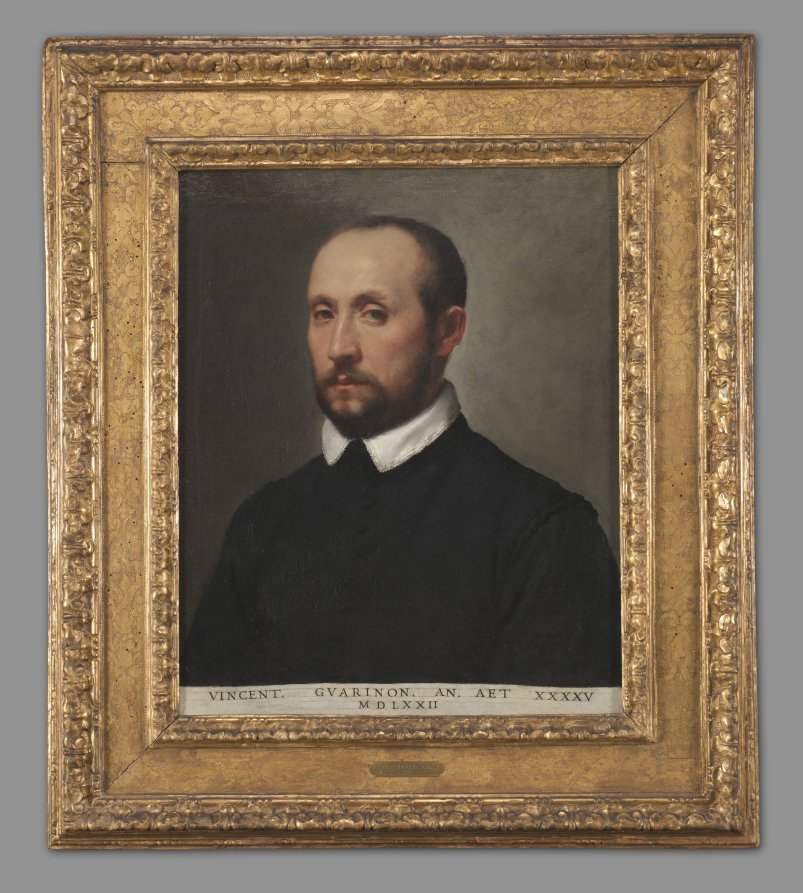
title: Portrait of Vincenzo Guarignoni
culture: Italy, Bergamo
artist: Giovanni Battista Moroni (Italian, 1525–1578)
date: c. 1572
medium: oil on canvas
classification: Painting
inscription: Inscribed at bottom: "VINCENT. GVARINON. AN. AET. XXXXV / MDLXXII"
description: The Latin inscription gives the sitter's name and age (45), as well as the painting's date. Guarignoni came from a prominent family in the northern Italian city of Bergamo. His direct and thoughtful gaze enhances the painting’s lifelike quality, while the solemn detachment conveys dignity and excellence rather than an exact personality, a common approach in Renaissance portraiture.